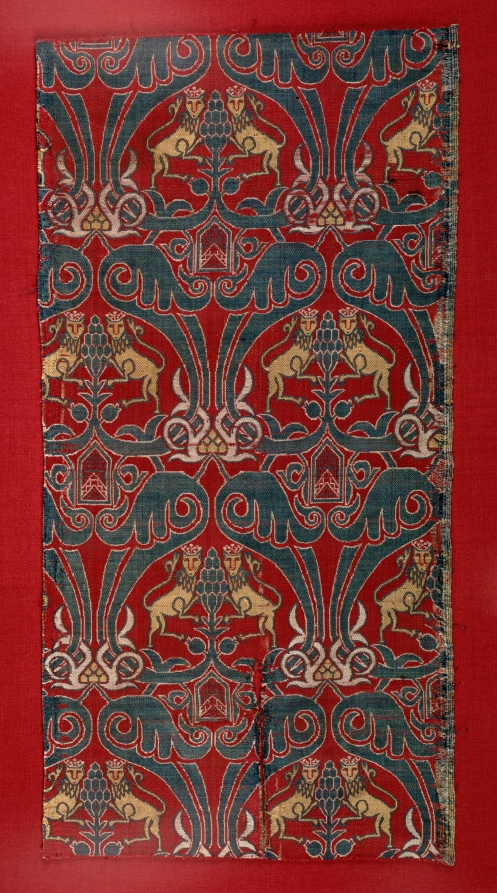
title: Fragment with crowned lions, palmettes, and escutcheons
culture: Spain, Granada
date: 1400s-1500s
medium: Silk: lampas weave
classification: Textile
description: Pairs of yellow lions are framed beneath arches formed by elaborate green leaves in a sumptuous repeated pattern. The city of Granada in southern Spain, where the Alhambra palace stood, continued to be a major center for silk production and commerce through the 1500s. Because the upside-down shields contain no Arabic inscriptions, it was probably made after the fall of the last Muslim sultan to the Christian King Ferdinand and Queen Isabella in 1492.